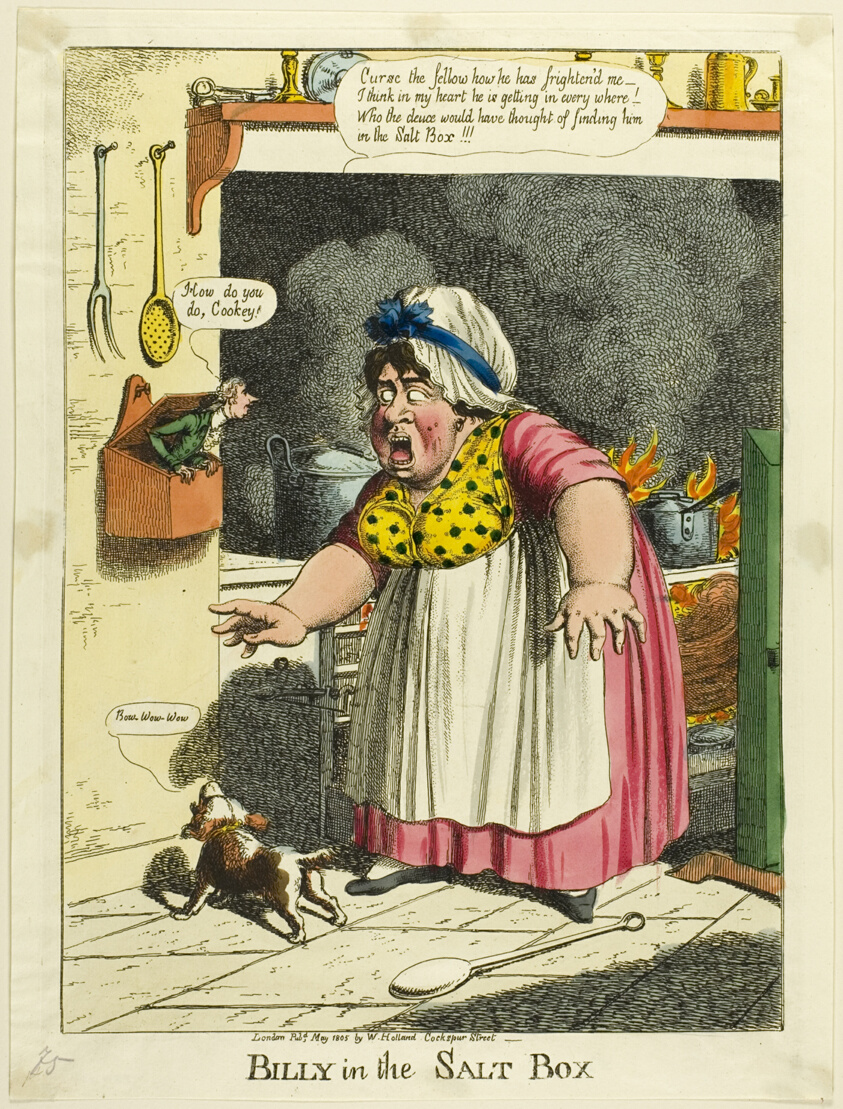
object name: Print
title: Billy in the Salt Box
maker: Charles Williams (English, active 1797-1830); published by William Holland (English, 1757-1815)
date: 1805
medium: Etching, with hand-coloring, on paper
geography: England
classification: etching; print; prints and drawing